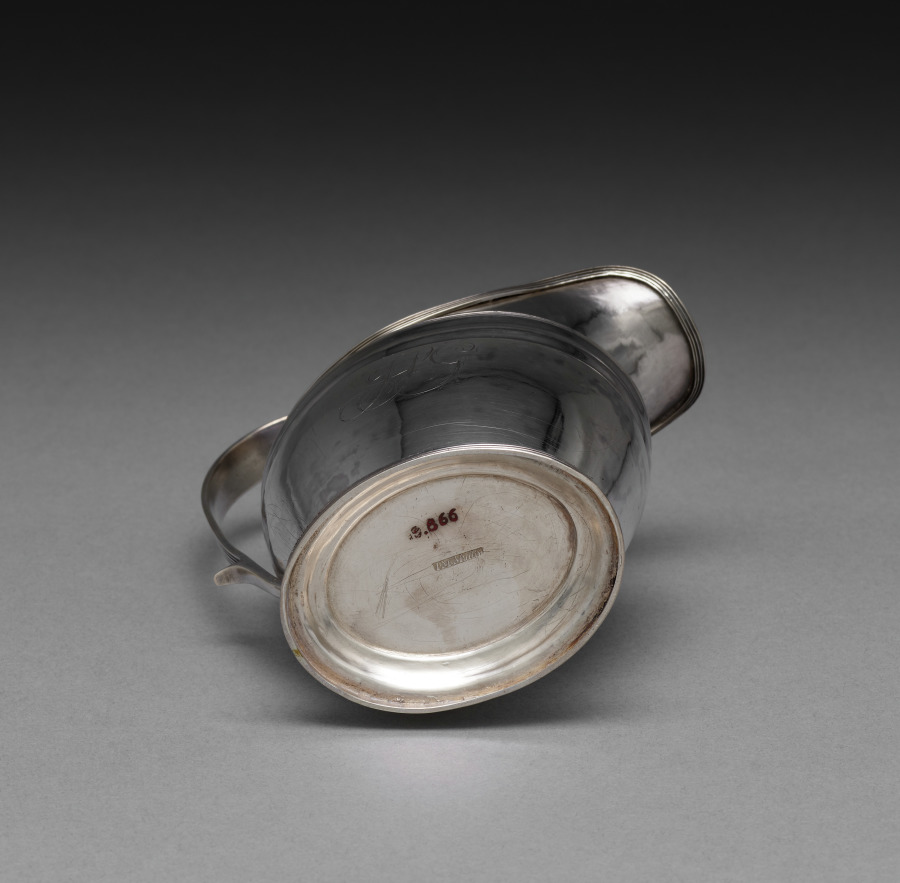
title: Cream Jug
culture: America, Pennsylvania, Philadelphia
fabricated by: John McMullin (American, 1765–1843)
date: c. 1800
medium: silver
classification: Silver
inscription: engraved "JSG" in bright-cut script on side to right of ahndle.